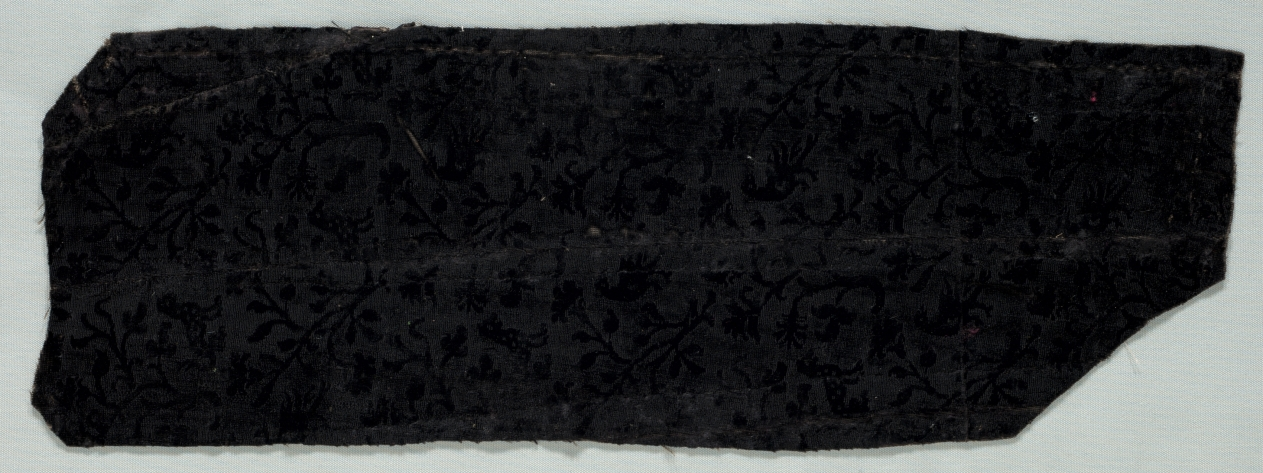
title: Velvet Fragment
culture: Italy, 17th century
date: 1600s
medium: velvet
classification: Velvet